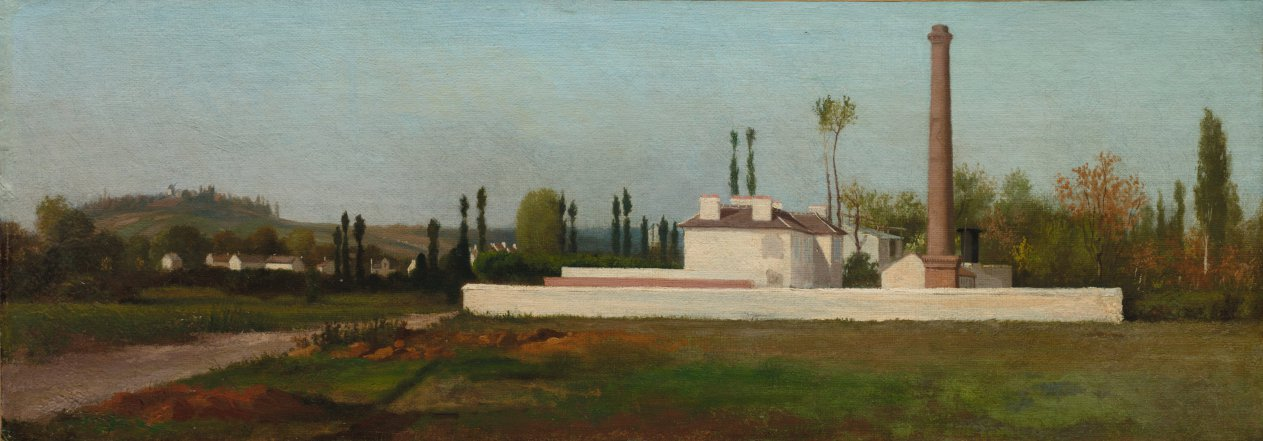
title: Industrial Plant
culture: France, 19th century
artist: Antoine Chintreuil (French, 1814–1873)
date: c. 1865–1870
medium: oil on fabric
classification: Painting